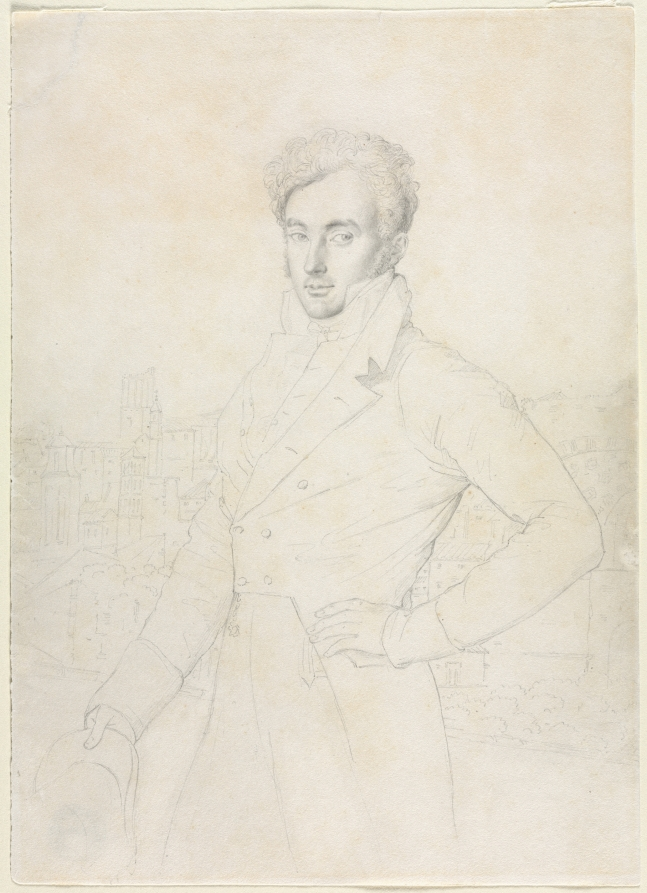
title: Portrait of a Young Man Standing on the Quirinal with the Turris Comitum in the Background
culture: France, 19th century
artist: follower of Jean-Auguste-Dominique Ingres (French, 1780–1867)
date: 1800s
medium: graphite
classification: Drawing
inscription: SECONDARY SUPPORT [nineteenth century?] (now removed), in brown ink: Ce portrait a été fait / Rome . par le grand Peintre / Jean-Baptiste - Ingres. / (qui fut Sénateur.). ; SECONDARY SUPPORT [nineteenth century?] (now removed), in graphite: Ce portrait a passé en vente à la mort de / Mme Ingres, mardi 10 avril 18[94] Hôtel Drouot salle 6